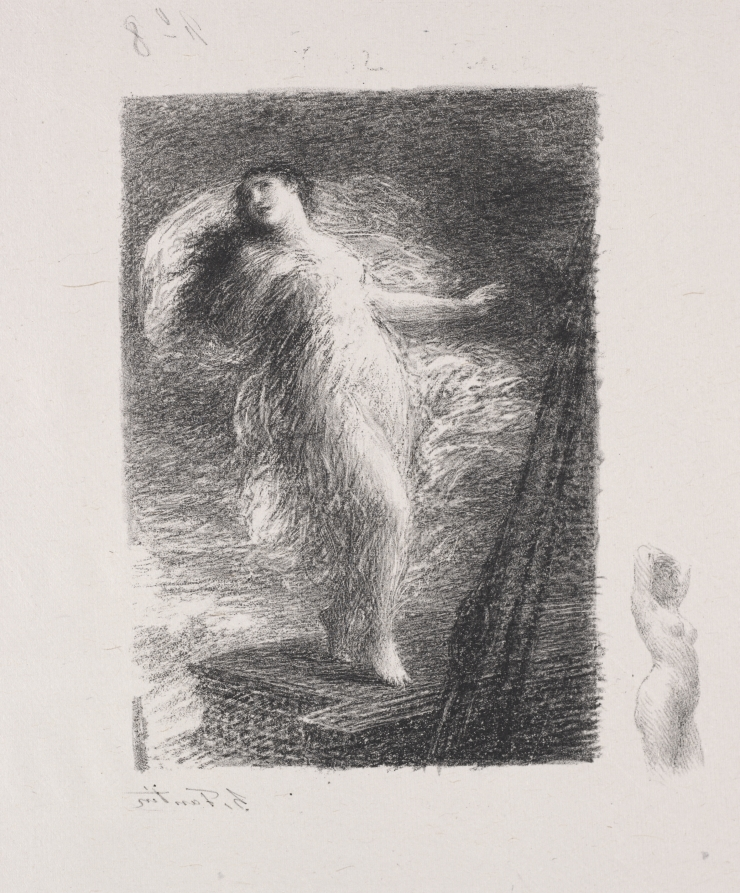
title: La jeune Tarentine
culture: France, 19th century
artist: Henri Fantin-Latour (French, 1836–1904)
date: 1903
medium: lithograph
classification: Print